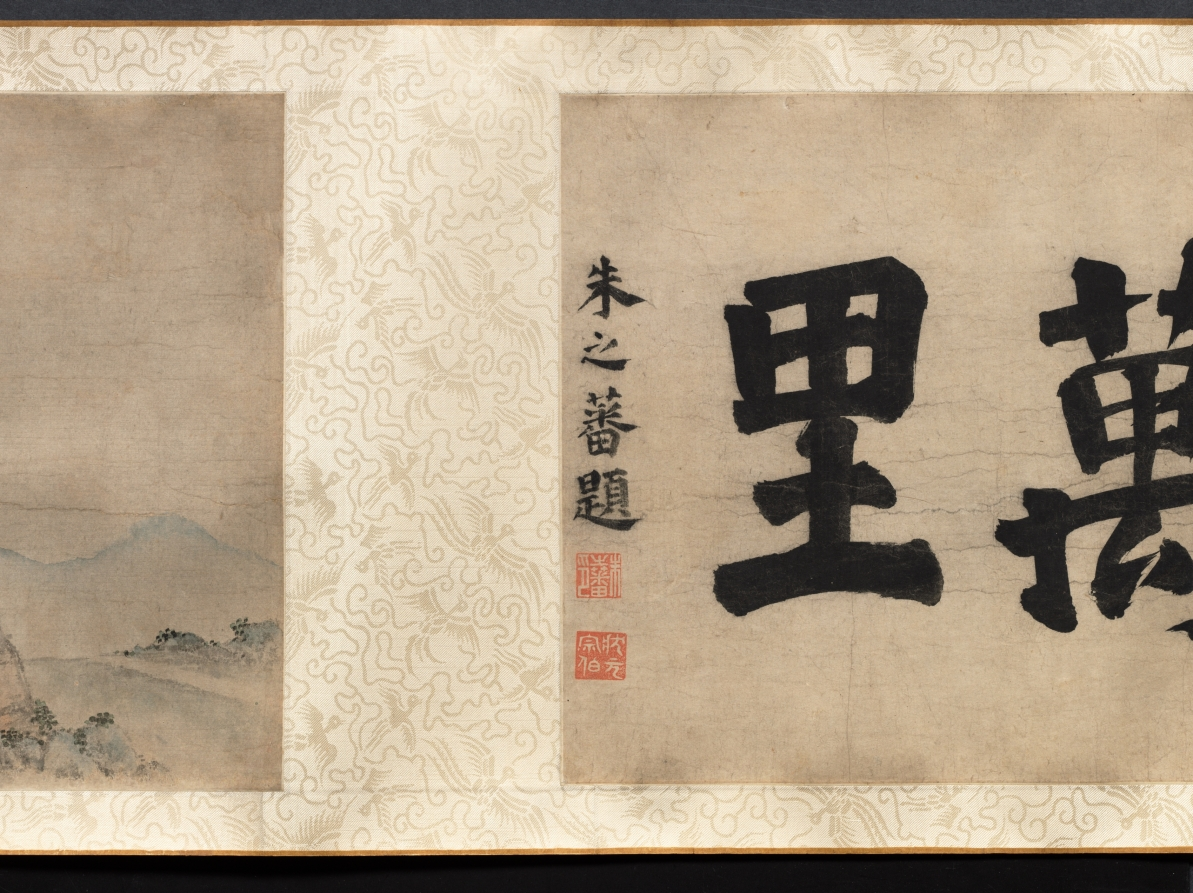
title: Ten Thousand Li of the Yangzi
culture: China, Ming dynasty (1368–1644)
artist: Dai Jin (Chinese, 1388–1462)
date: c. 1400s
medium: Handscroll; ink and color on paper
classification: Painting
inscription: Two colophons at end. Artist's seals: Dai Jin 戴進 and Wenjin 文進.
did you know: Dai Jin is traditionally considered the founder of the Zhe School, a style of landscape painting.